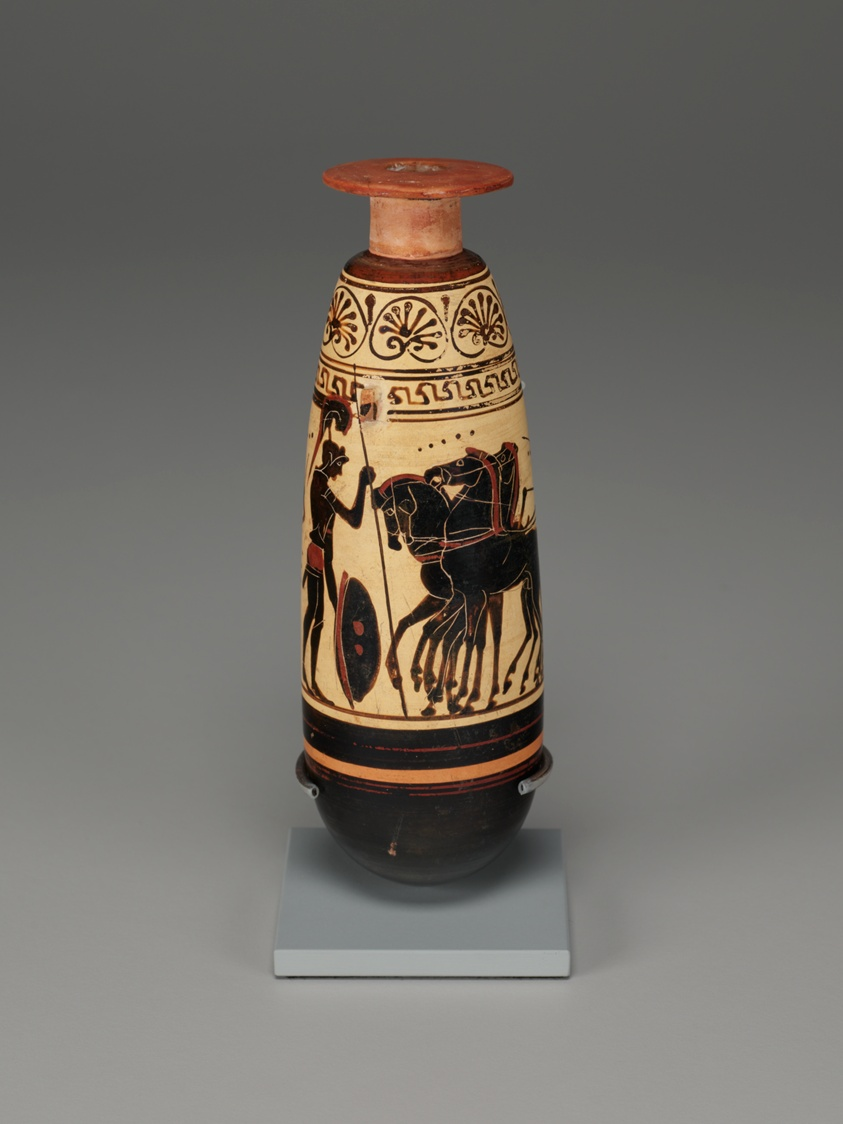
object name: Vessel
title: Alabastron (Container for Scented Oil)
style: archaic (greek), attic, ancient, greek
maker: Attributed to the Diosphos Painter; Greek; Athens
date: about 500-480 BCE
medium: terracotta, black-figure on white ground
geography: Athens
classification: vessel; ancient art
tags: mythology, beauty, rituals